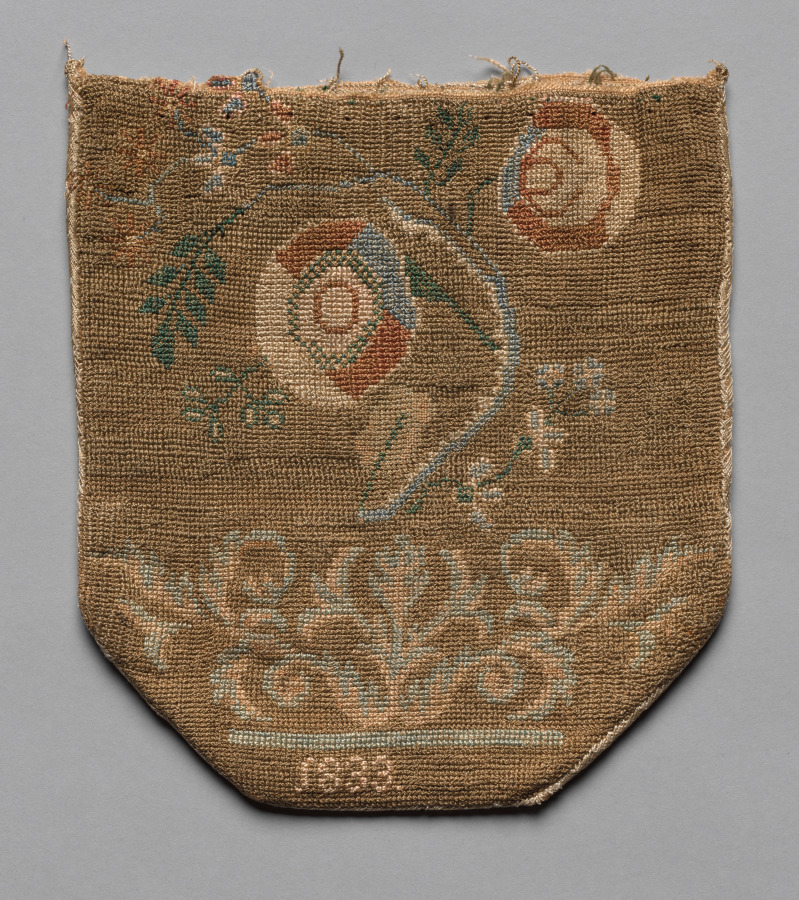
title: Embroidered Bag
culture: America, first half 19th Century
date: 1833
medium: embroidery, silk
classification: Embroidery